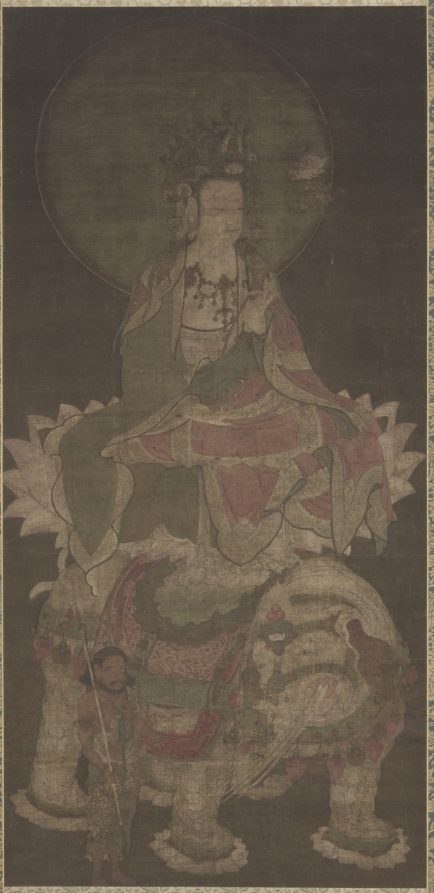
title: Samantabhadra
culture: China, Southern Song dynasty (1127-1279)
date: 1100s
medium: hanging scroll; ink and color on silk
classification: Painting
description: In the last chapter of the Lotus Sutra, one of the principal Buddhist texts, the great Bodhisattva Samantabhadra is described advancing to earth, riding on a six-tusked elephant, and proclaiming himself protector of the faithful. More frequently, he is shown with Bodhisattva Manjusri as the attendants of Shakyamuni (the historical Buddha). This scroll is probably the left panel in a triptych (group of three paintings) portraying these deities.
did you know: Samantabhadra holds a lotus with a sutra on top of the blossom.